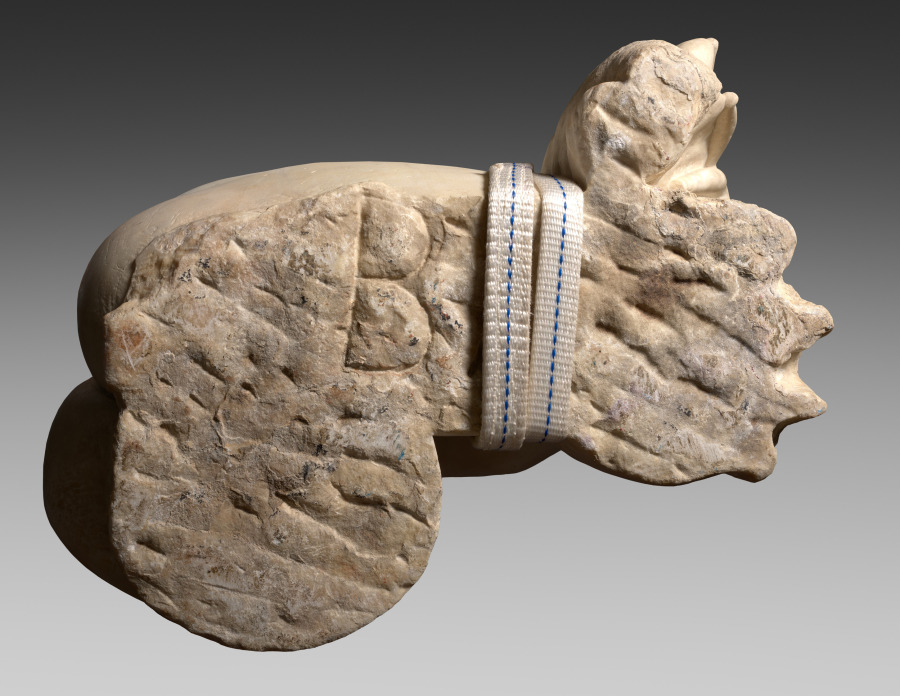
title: Fata Morgana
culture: Italy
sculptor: Giambologna (Flemish, active Italy, 1529–1608)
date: c. 1572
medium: Marble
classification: Sculpture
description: Commissioned by prominent banker Bernardo Vecchietti, whose surname means “old,” Fata Morgana took the name both of the nearby spring that fed the fountain she surmounted, and the legendary fairy who restored King Arthur’s youth. The Fata Morgana is one of only around a dozen sculptures in marble by Giambologna. The artist’s favorite subject was the female nude because of its capacity to showcase his extraordinary ability to model softness in hard stone and to convey dynamic movement. Her twisting pose invites the viewer to appreciate the Fata Morgana from every angle.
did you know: The sculpture originally appeared to emerge mysteriously from a cave within a constructed grotto.